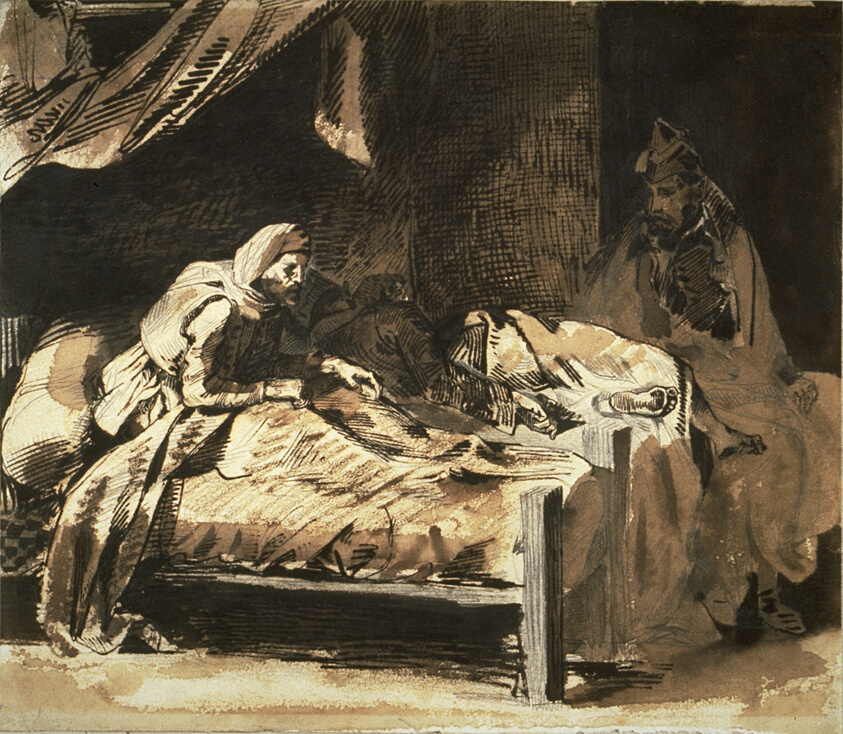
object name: Drawing and Watercolor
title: Military Hospital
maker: Eugène Delacroix (French, 1798-1863)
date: c. 1824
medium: Pen and brush and iron gall ink, brush and brown wash, and graphite, on ivory wove paper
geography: France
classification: ink or chalk wash; drawings (visual works); prints and drawing